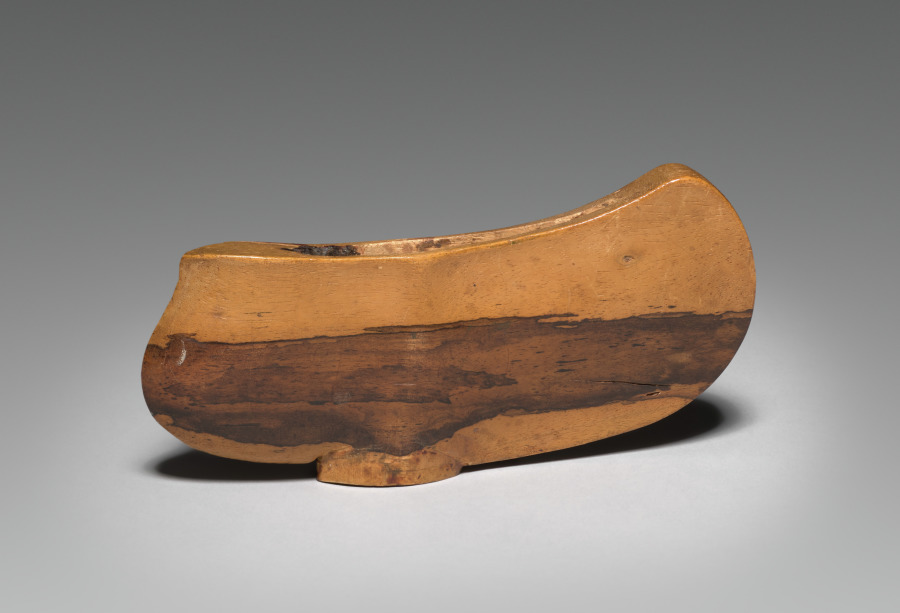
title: Sword (Kris)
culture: Java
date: 1800s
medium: iron with wooden handle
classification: Arms and Armor